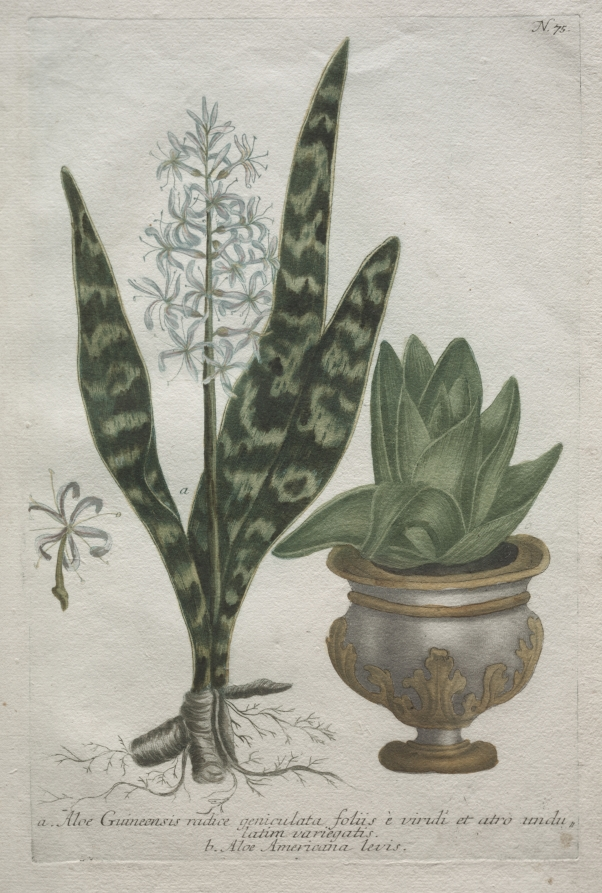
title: Aloes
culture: Germany, 18th century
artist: Bartholomaus Seutter (German, 1678–1754)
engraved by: Johann Jakob Haid (German, 1704–1767)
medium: engraving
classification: Print